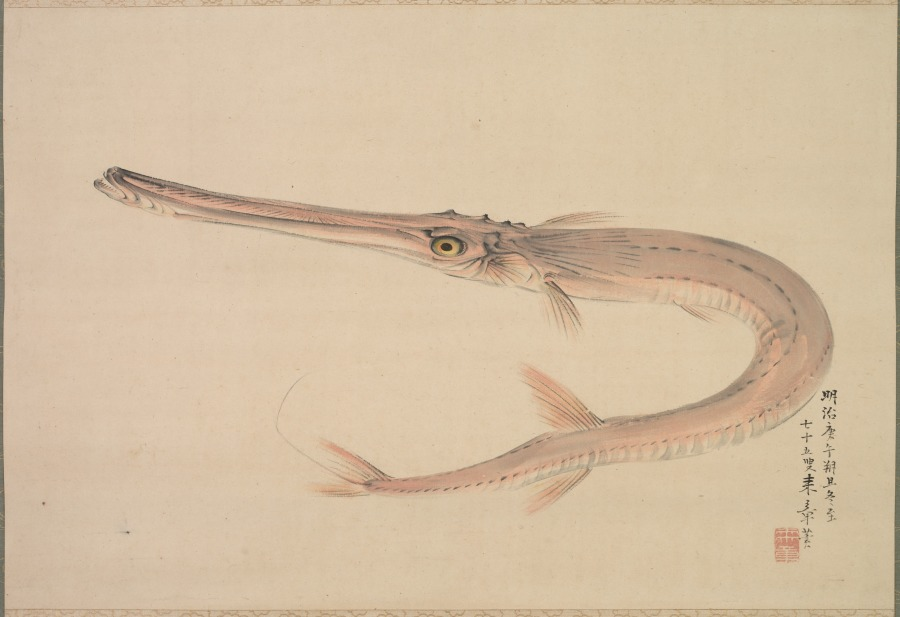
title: Needlefish (Yagara)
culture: Japan, Edo period (1615–1868)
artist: Nakajima Raishō (Japanese, 1796–1871)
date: 1870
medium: hanging scroll; ink and color on paper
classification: Painting